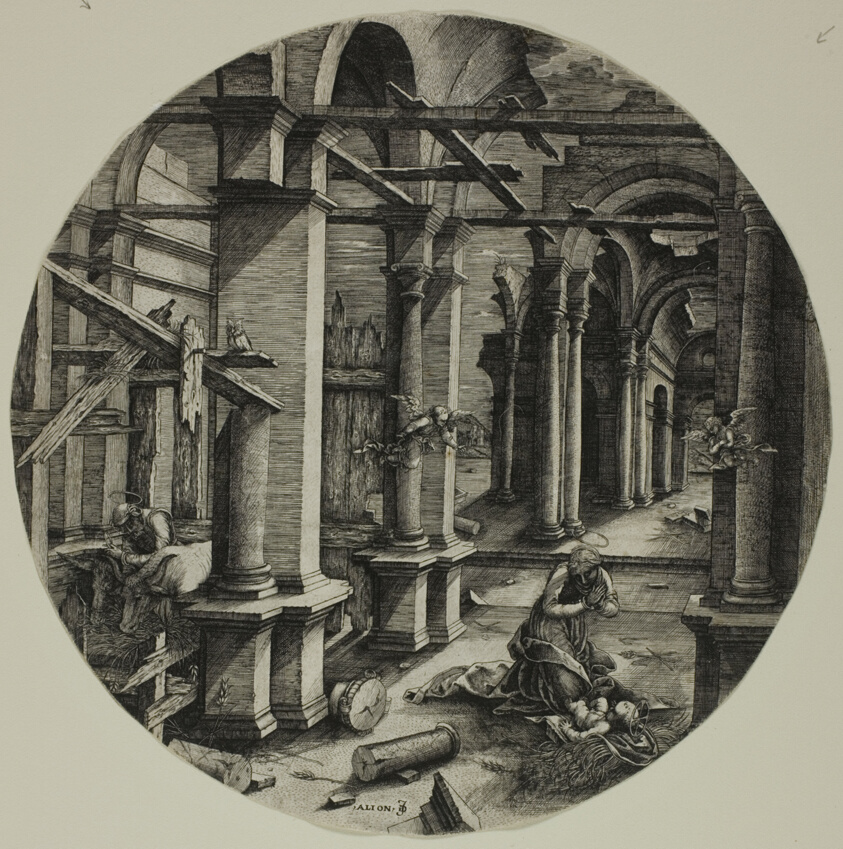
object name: Print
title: The Stable in Bethlehem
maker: Jean de Gourmont (French, 1506-1551)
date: c. 1520–40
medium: Engraving in black on ivory laid paper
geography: France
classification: engraving; print; prints and drawing